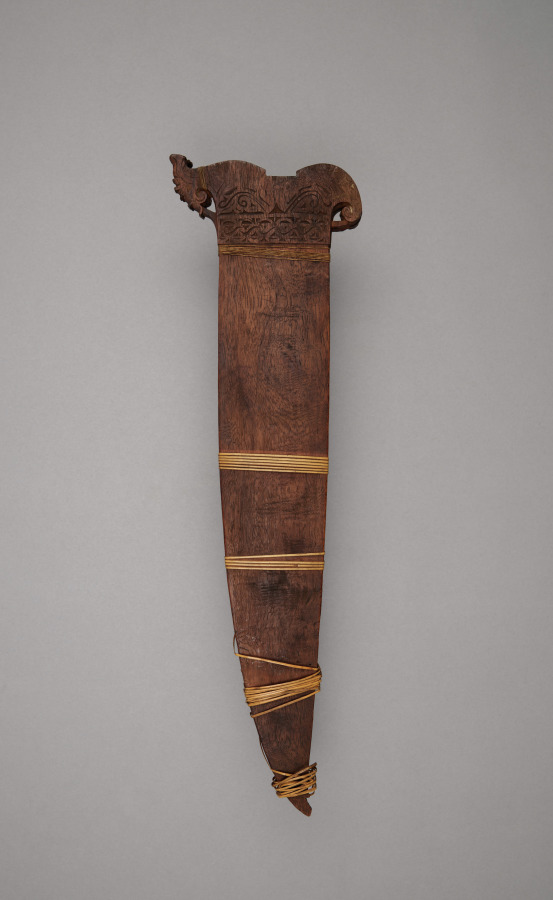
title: Scabbard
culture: Philippines, Mindanao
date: 1800s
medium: Wood with rattan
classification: Arms and Armor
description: The flared form of this wooden scabbard indicates that it was made to house a barong blade, probably belonging to the Maranao, Tausug, or Yakan people. The upper section features incised scroll-like motifs, similar to the stylized floriate designs common in southern Philippine okir carving traditions. Several bands of rattan lashings reinforce the sheath, adding both structural stability and decorative rhythm.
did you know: The graceful, winglike profile of the scabbard’s mouth is typical of work made by the Muslim populations of the southern Philippines.